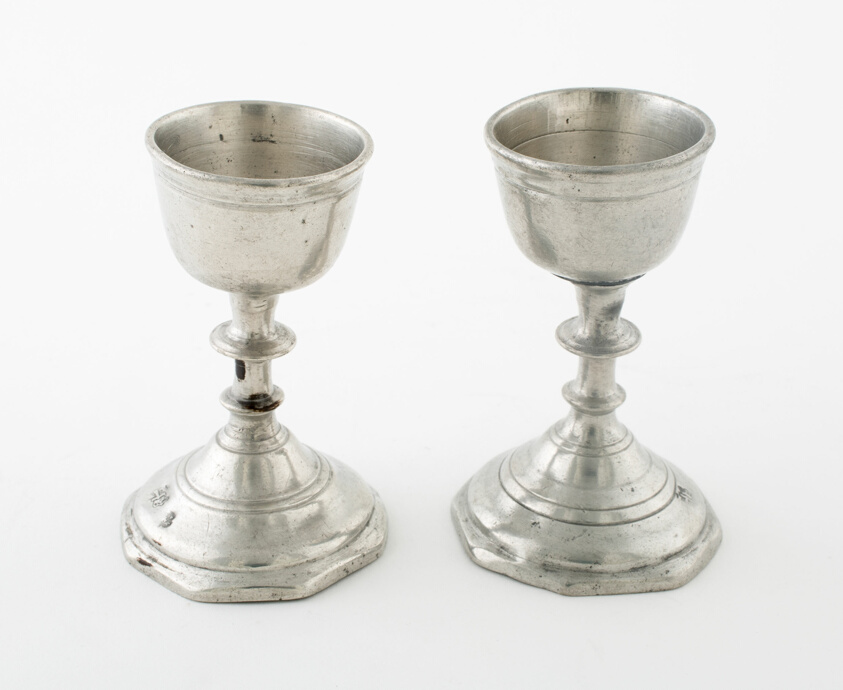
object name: Metalwork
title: Pair of Small Chalices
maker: Sedan Region, France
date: Early 18th century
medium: Pewter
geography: France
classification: drinking vessel; pewter; metalwork; european decorative arts